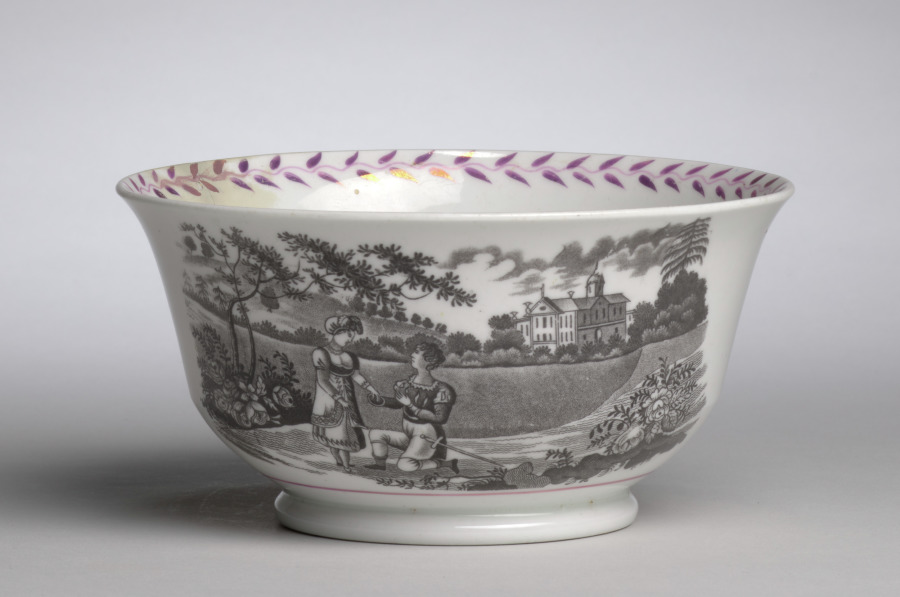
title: Waste Bowl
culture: England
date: c. 1800–1825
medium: earthenware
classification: Ceramic